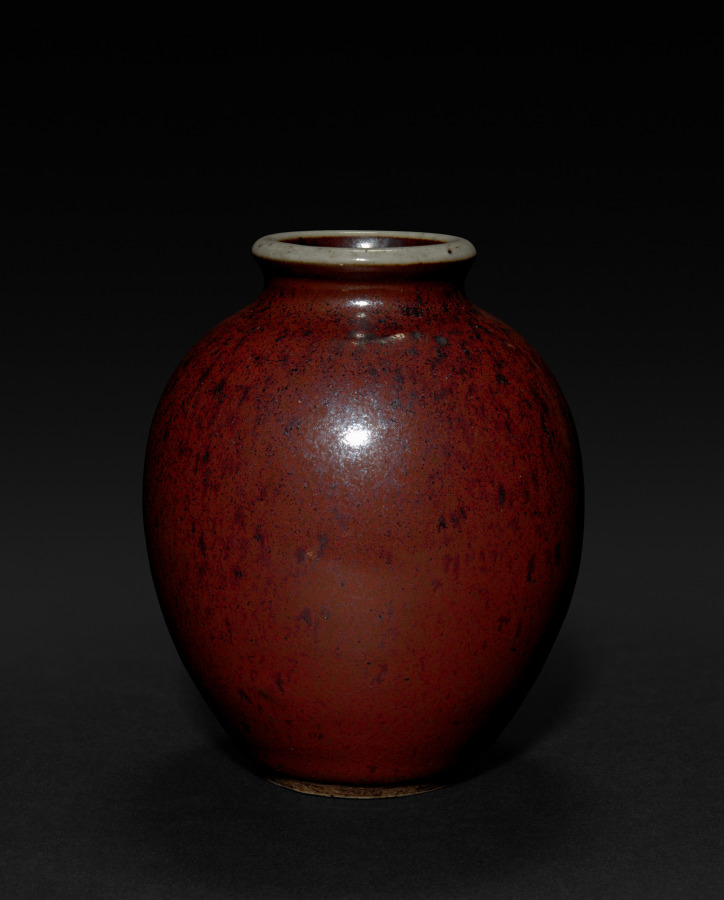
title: Jar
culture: China, Qing dynasty (1644–1911), Qianlong reign (1736–95)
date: 1736–95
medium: porcelain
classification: Ceramic